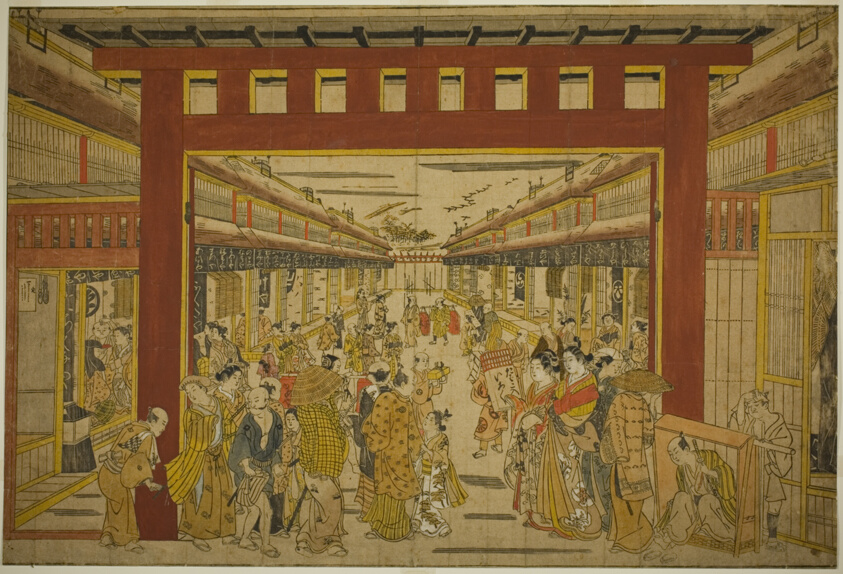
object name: Print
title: Nakanocho in the Yoshiwara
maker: Attributed to Okumura Masanobu; Japanese, 1686-1764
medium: Hand-colored woodblock print; o-oban, beni-e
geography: Japan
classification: woodblock print; print; asian art